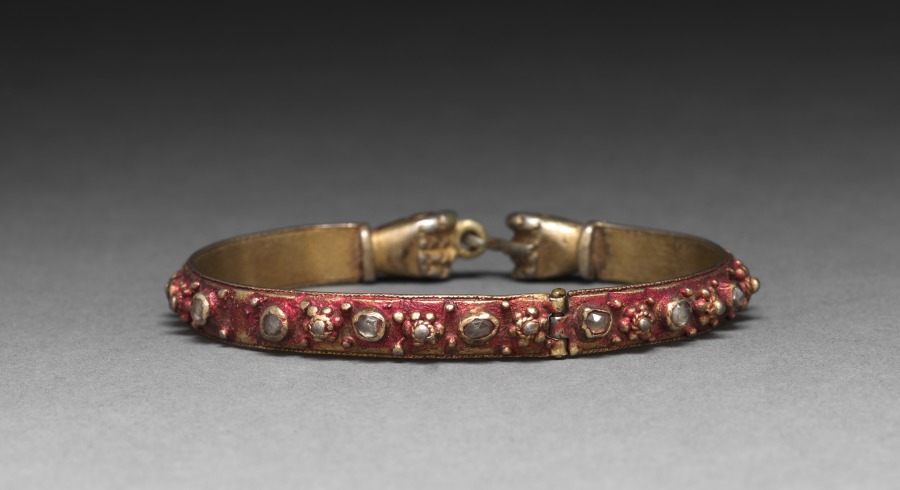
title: Bracelet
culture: Siam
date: 1800s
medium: silver gilt with diamonds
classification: Jewelry